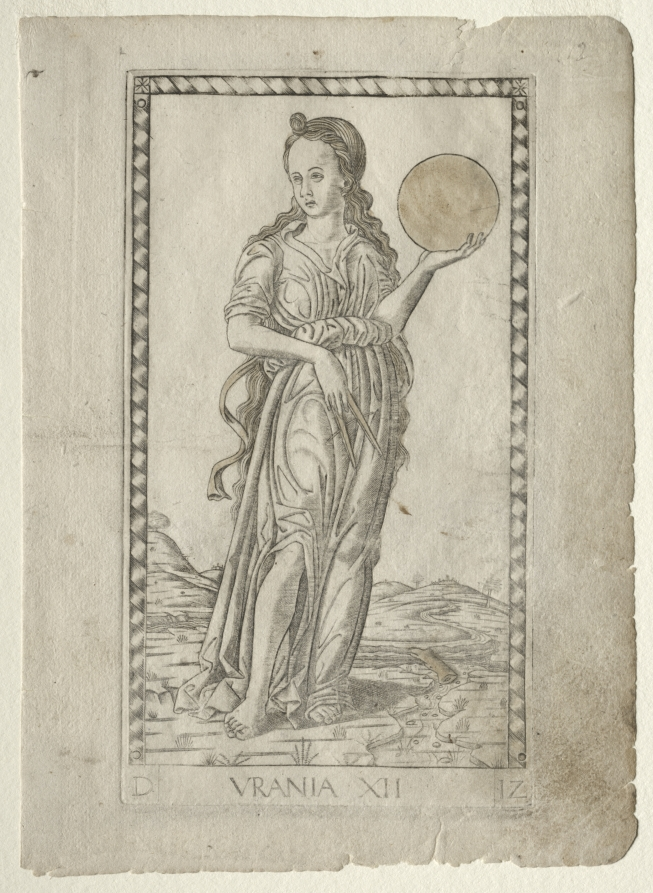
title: Urania (astronomy) (from the Tarocchi series D: Apollo and the Muses, #12)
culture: Italy, Ferrara, 15th century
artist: Master of the E-Series Tarocchi (Italian, active 1460s)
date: before 1467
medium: engraving hand-colored with gold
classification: Print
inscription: Lettered below the image of Urania (Muse of Astronomy): ·D· / ·URANIA·XII· / ·12·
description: This engraving is part of the Tarocchi group marked with the letter “D,” and named Apollo and the Muses. In Greek mythology, the nine Muses (Calliope, Urania, Terpsichore, Erato, Polyhymnia, Thalia, Melpomene, Euterpe, and Clio) were the daughters of Zeus, king of the gods, and Mnemosyne, the Titaness of memory. The Muses were goddesses presiding over different branches of the arts and sciences. Their leader and supervisor was Apollo, the god of light, music, prophecy, and poetry. Here, Urania is personified as a full-length female figure, set in an imaginary hilly landscape. She carries a celestial globe in her left hand, and a compass in her right hand, symbolizing that she is the Muse of Astronomy.